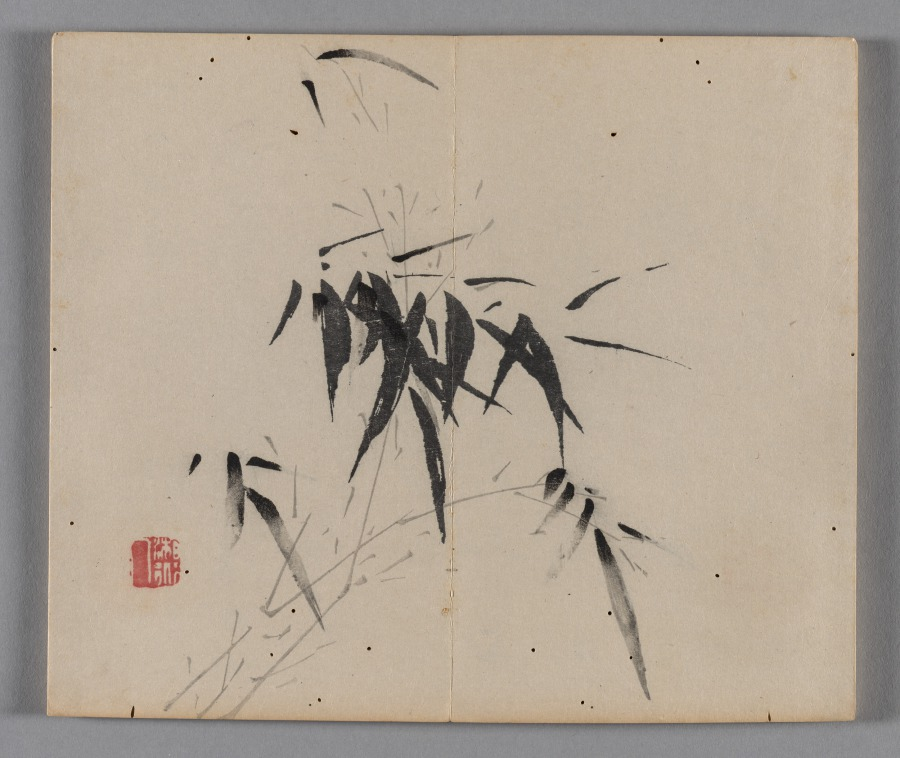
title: Ten Bamboo Studio Collection of Calligraphy and Painting: Miscellaneous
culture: China, Qing dynasty (1644-1911)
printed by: Hu Zhengyan (Chinese, c. 1584–1674)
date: 1633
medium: Woodblock-printed book; ink and colors on paper; first edition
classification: Print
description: Color printing reached a level of perfection in the early 1600s, as seen in this Ten Bamboo Studio Collection of Calligraphy and Painting and the Mustard Seed Garden Manual of Painting (printed 1679 and 1701). The painterly quality, precision in registering (aligning) the woodblocks, and harmonious colors made them the most successful color print editions in Chinese history. Both editions were printed and compiled in Nanjing, spread nationwide, and had a great impact on the arts in Japan and Korea.